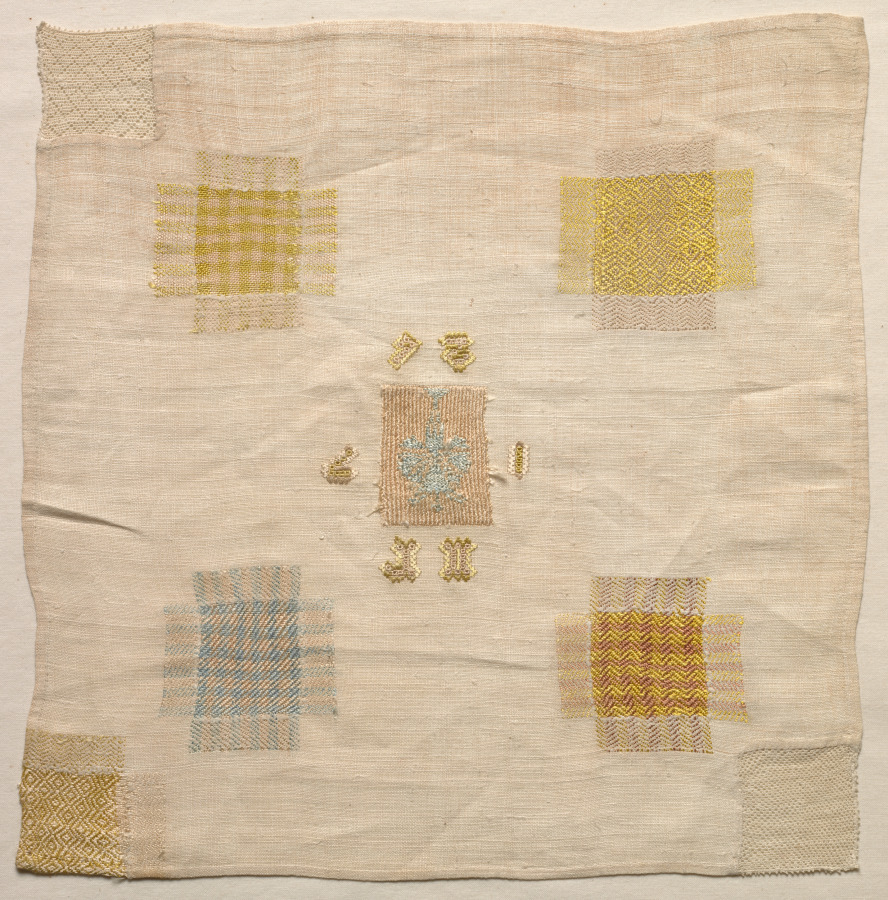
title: Darning Sampler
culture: Netherlands, late 18th century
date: 1784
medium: embroidery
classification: Sampler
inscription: surrounding vase in center: "M F/ 1 7/ 84."